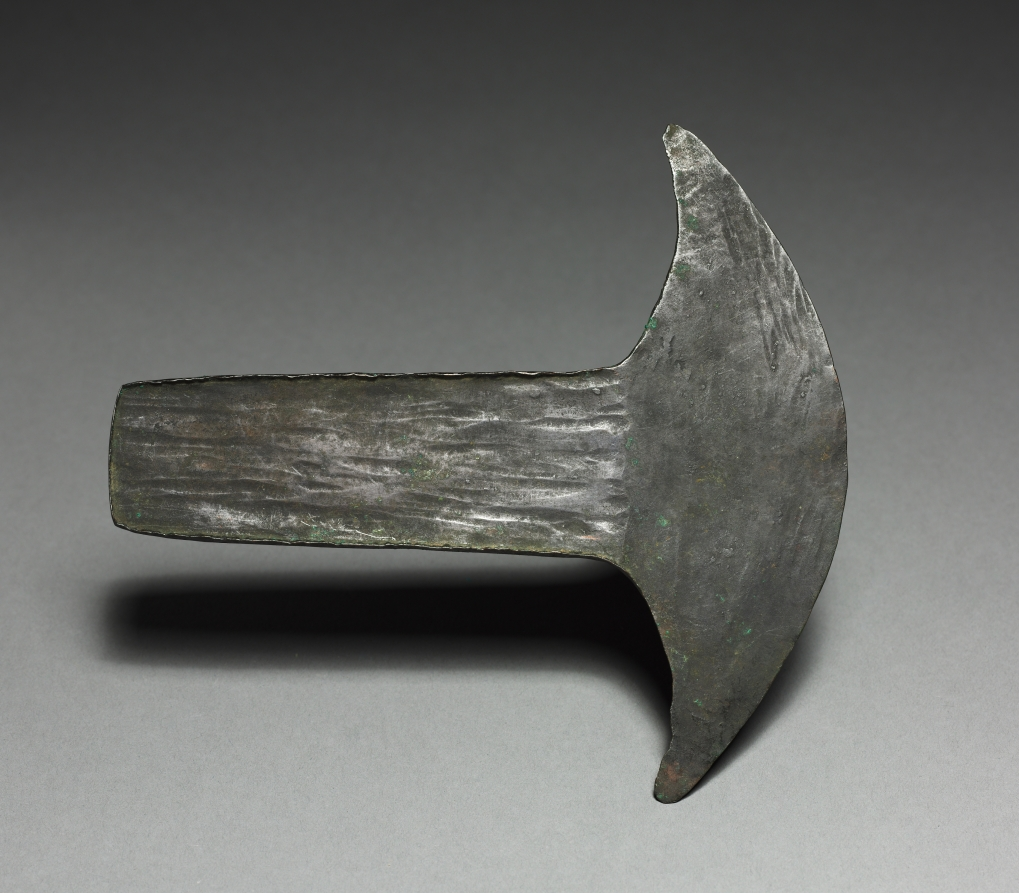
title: Axe-shaped Implement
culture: Mexico, Oaxaca, Mixtec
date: 1200–1519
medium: cast and hammered copper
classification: Metalwork